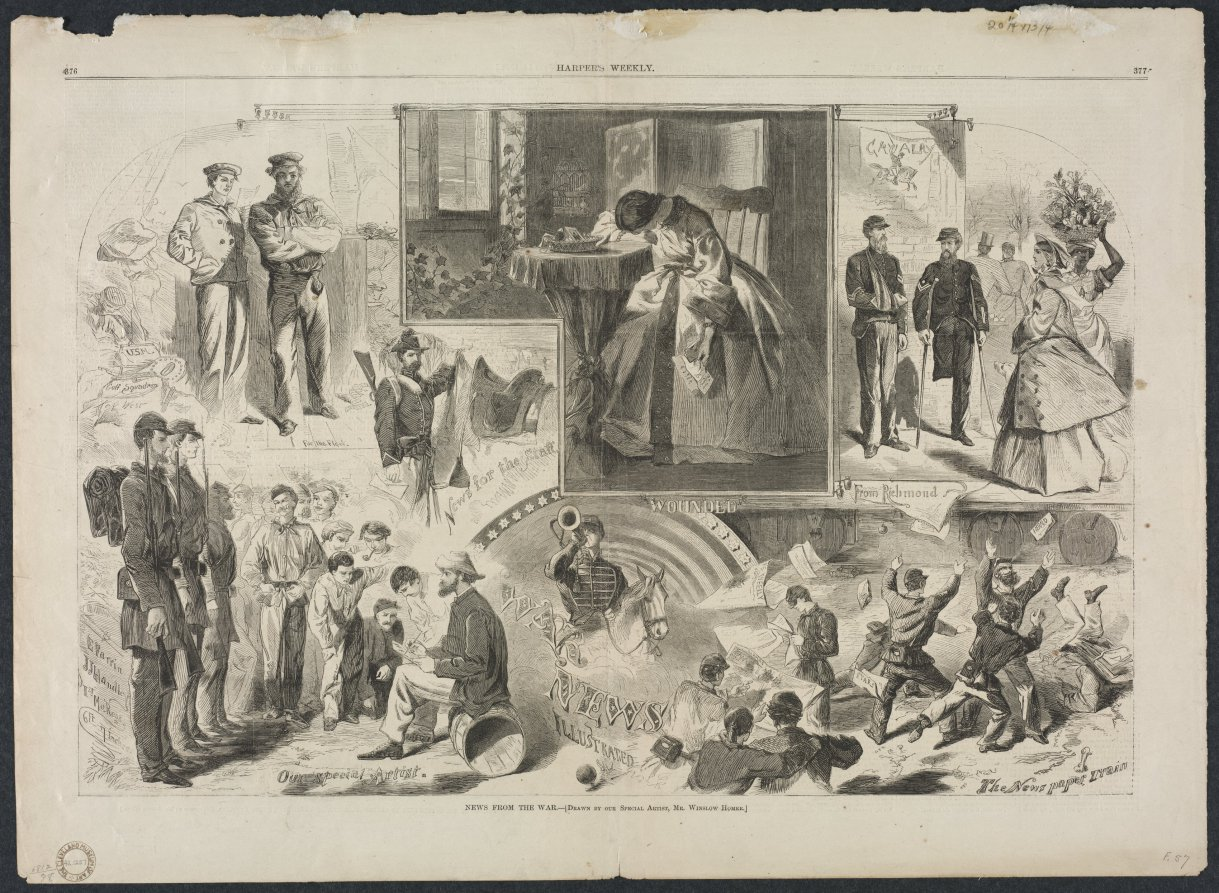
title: News from the War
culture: America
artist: Winslow Homer (American, 1836–1910)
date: 1862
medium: wood engraving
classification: Print